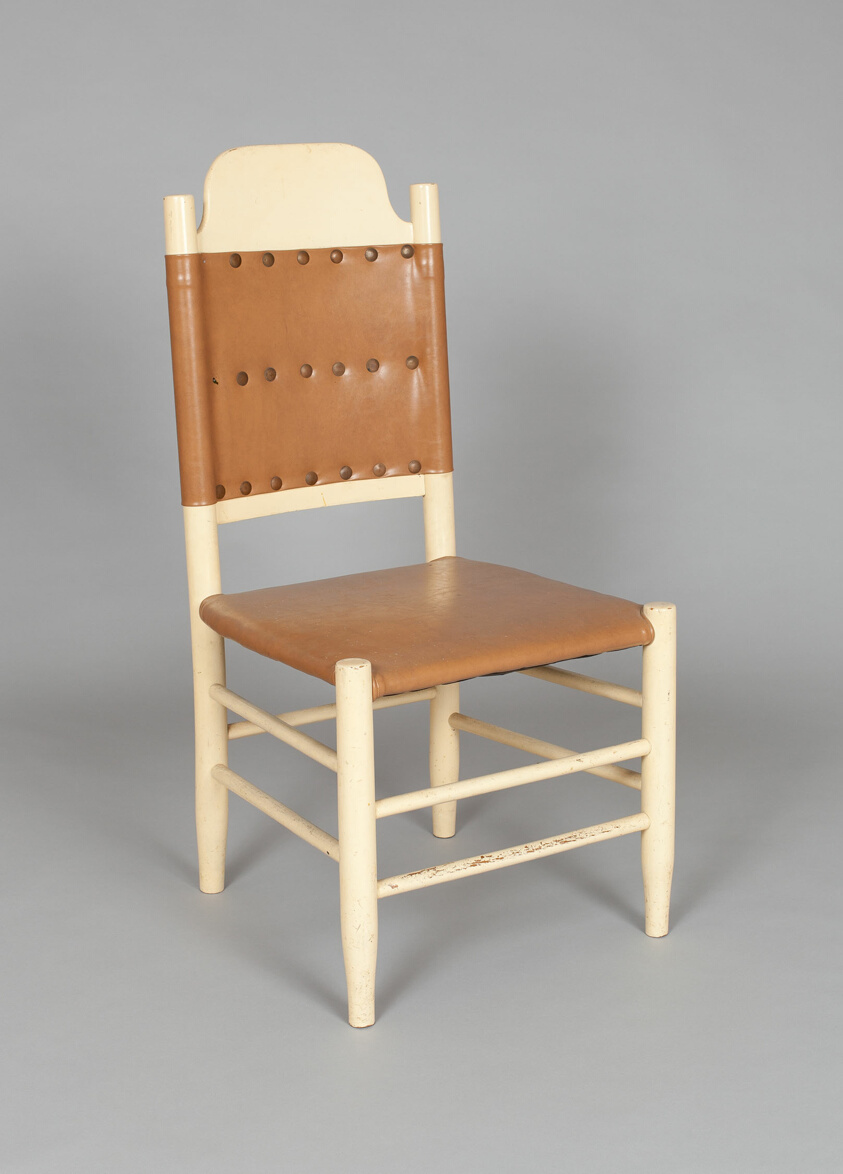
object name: Furniture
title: Side Chair (part of a set)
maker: Designed by Louis Comfort Tiffany (American, 1848–1933); Made by J. Matthew Meier (American, 1830–1913) and Ernest Hagen (American, 1822–1889); New York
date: c. 1885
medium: Painted maple, with vinyl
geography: New York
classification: seating; furniture; american decorative arts; american arts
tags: furniture